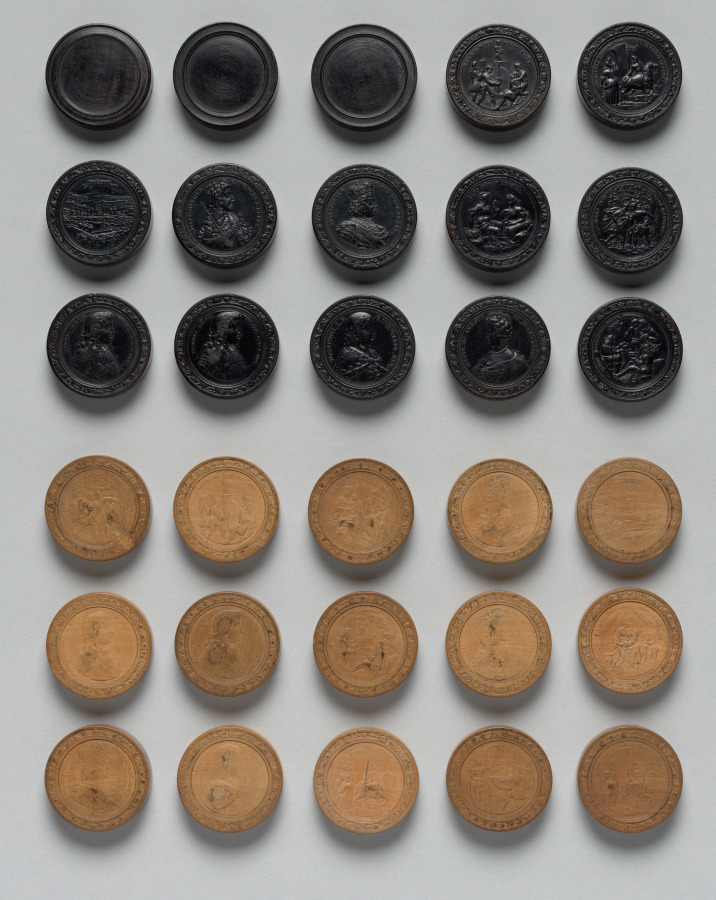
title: Gaming Set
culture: Germany, late 17th-early 18th Century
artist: Martin Brunner (German, 1659–1725)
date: c.1700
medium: wood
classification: Furniture and woodwork